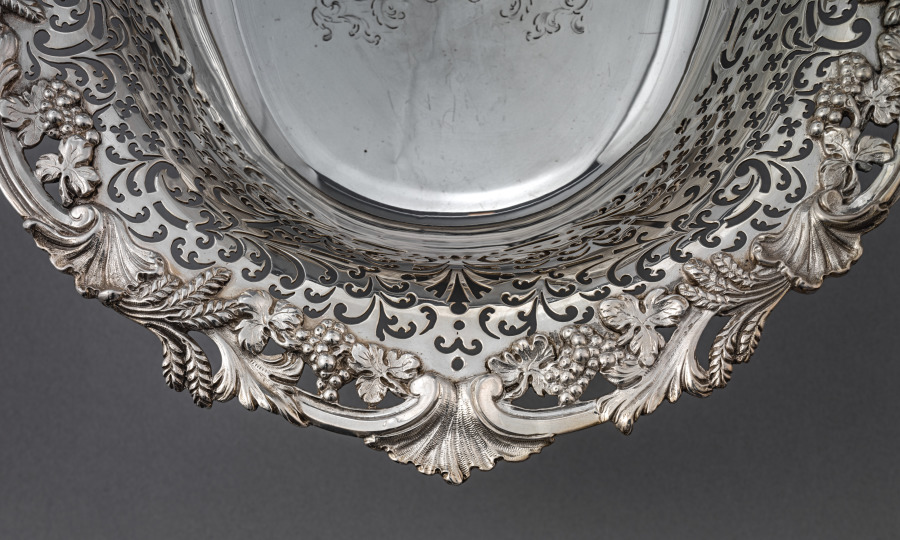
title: Cake Basket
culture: Britain, London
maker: Samuel Herbert and Company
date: 1753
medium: Silver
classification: Silver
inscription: “H/I I”; hallmark for London, George II, Samuel Herbert and Henry Bailey, and date 1753.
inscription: “To/H.H.M./from/S.K., E.W.G., J.H.J., D.R.L., M.B.R./on the occasion of his/Silver Wedding/1911-1936”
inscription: “50-2”; hallmark for London, George II, Samuel Herbert and Henry Bailey, and date 1753.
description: Drinking tea at the end of the day, accompanied by sweet cakes and savory delights, became an established ritual in Britain at all levels of society during the 1700s. In grand houses, silver teapots, caddies, and cake baskets elevated this afternoon refreshment to a formal gathering.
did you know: Sheaves of wheat adorning the rim of this basket allude to the flour used in pastries and cakes for tea.